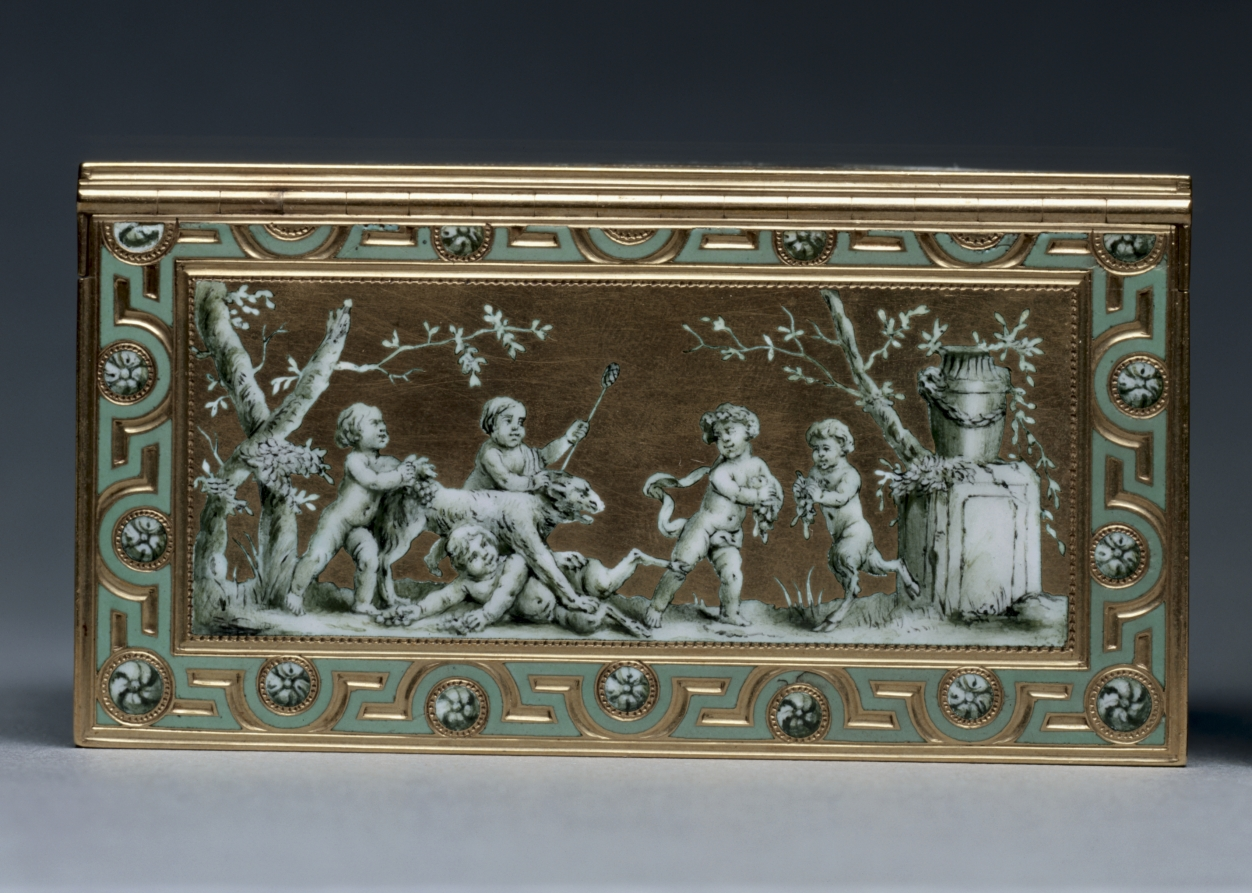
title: Box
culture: France, 18th century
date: c. 1768–1769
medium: gold and enamel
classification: Enamel